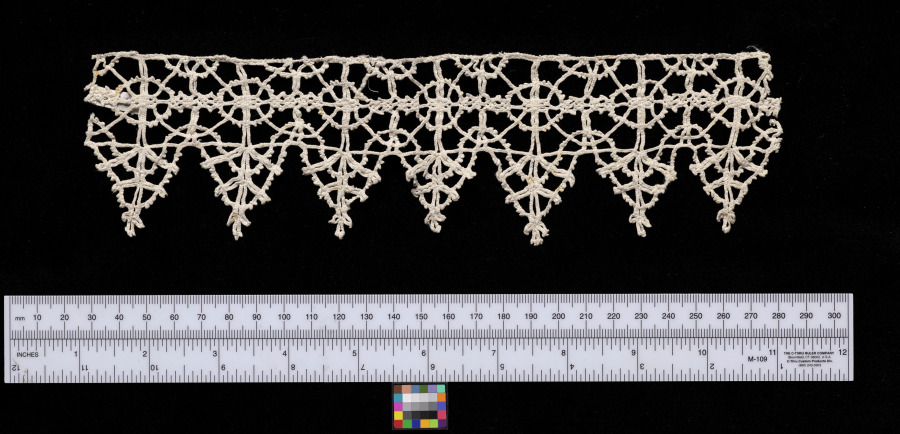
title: Lace Insertion with Edging of Points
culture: Italy, Venice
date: 1500s–1600s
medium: Bobbin lace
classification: Lace